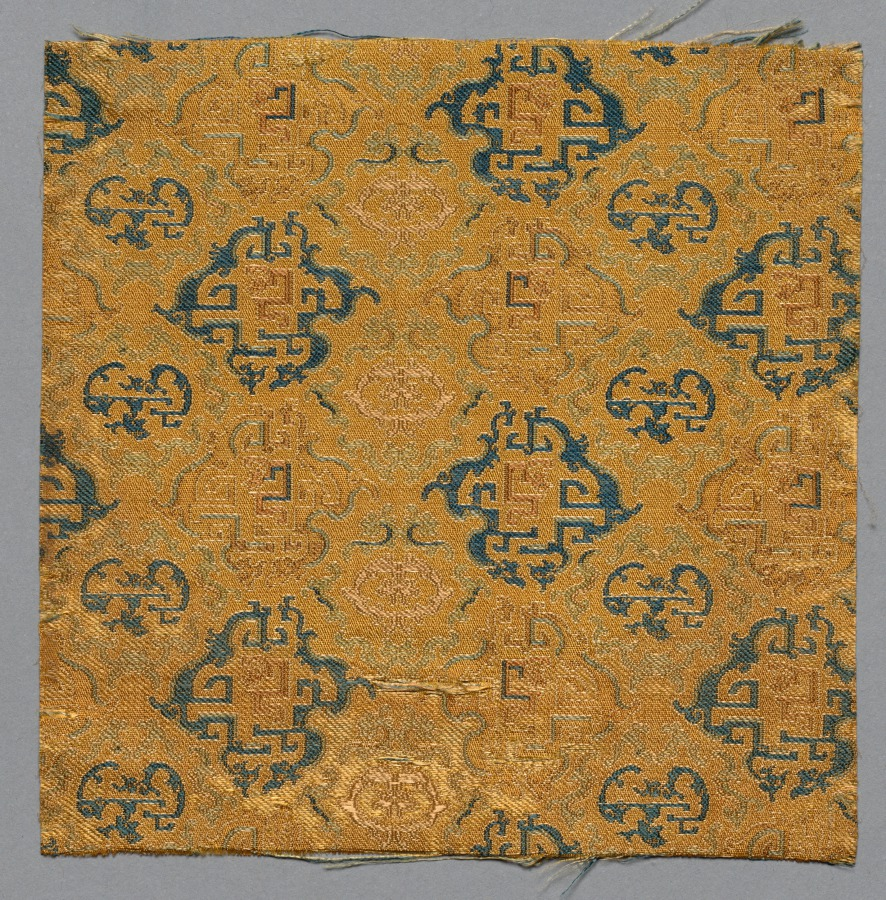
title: Fragment from Book of Textiles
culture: China, Qing dynasty (1644-1911)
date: early 1700s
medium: twill ground; silk diasper weave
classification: Textile